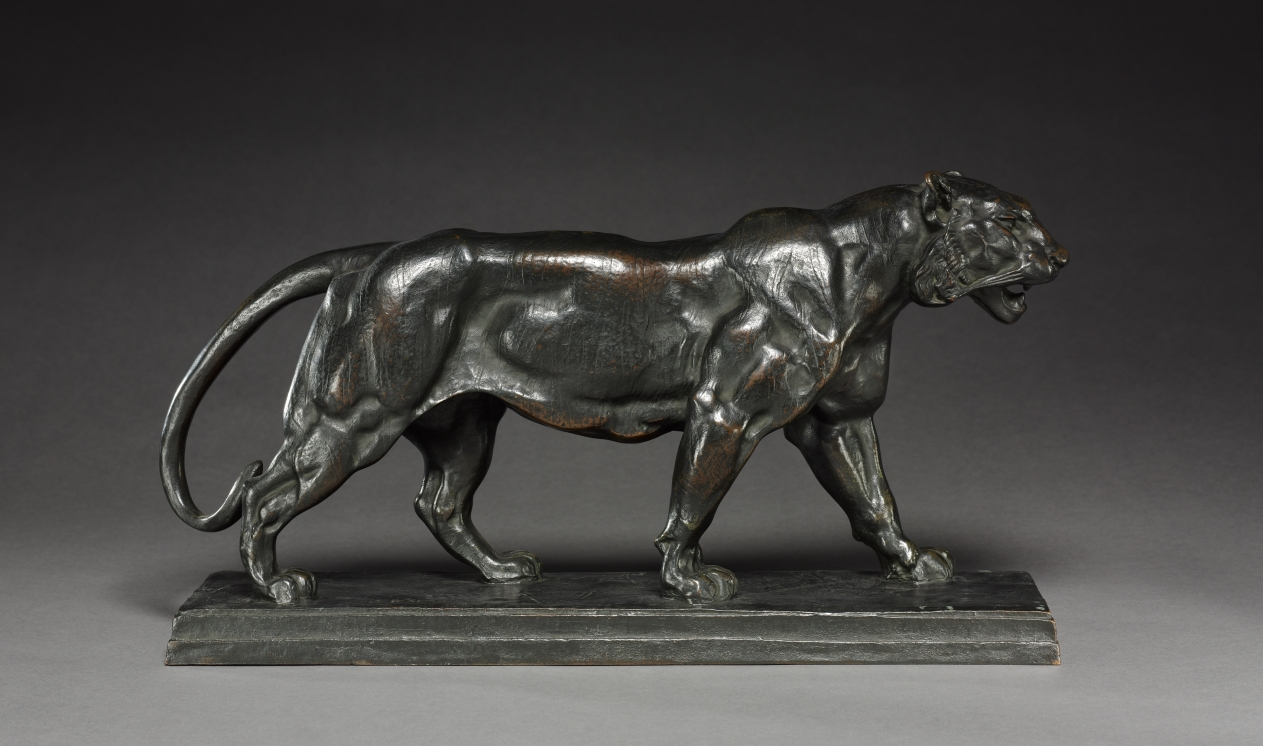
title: Walking Tiger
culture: France, 19th century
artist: Antoine-Louis Barye (French, 1796–1875)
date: c. 1836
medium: bronze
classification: Sculpture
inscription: Signed on base: "Barye"